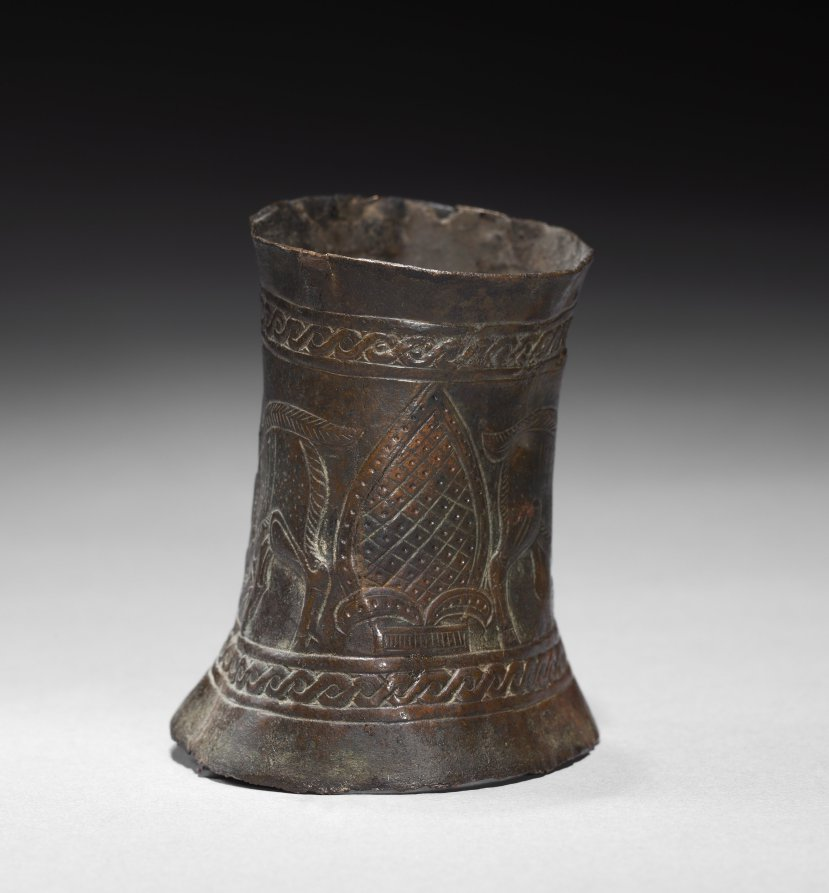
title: Decorated Cylinder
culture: Iran, Mannaean, Ziwiye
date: c. 1000–800 BCE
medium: bronze, repoussé and incised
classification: Metalwork